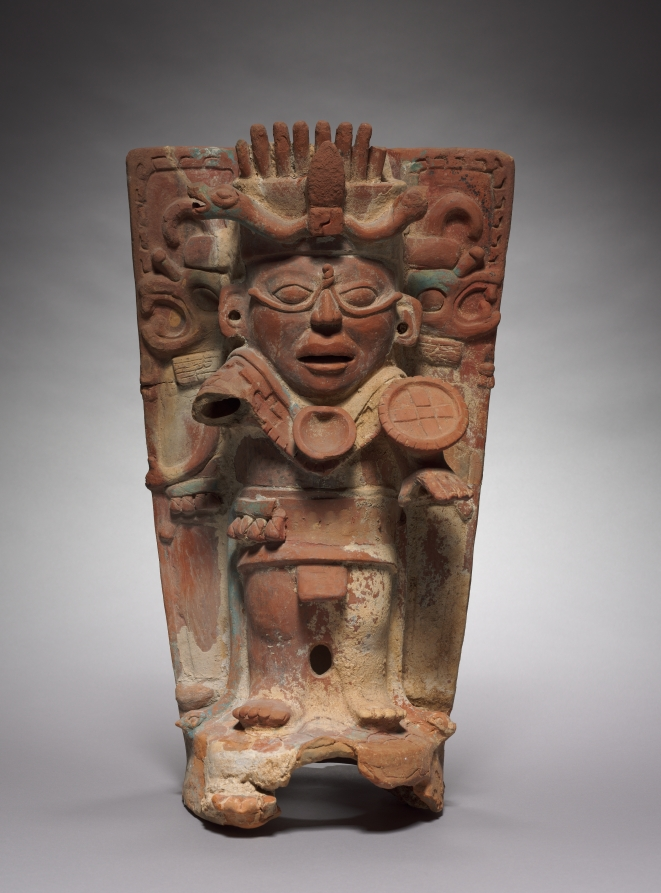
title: Incense Burner Support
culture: Mexico, Chiapas, Palenque Region, Maya, Classic period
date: 600–900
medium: pottery with polychrome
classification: Sculpture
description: This stand, made of a large tube with side panels, originally held a bowl used to ritually burn incense. Modeled on the front is a group that includes the Maya sun deity and two flanking, profile figures in lower relief. All are supported by a turtle, a symbol of the earth and the underworld. Thus, the ensemble may be a model of the cosmos.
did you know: Calcium deposits indicate this incense burner was found in a cave, which the Maya viewed as entrances to the underworld.